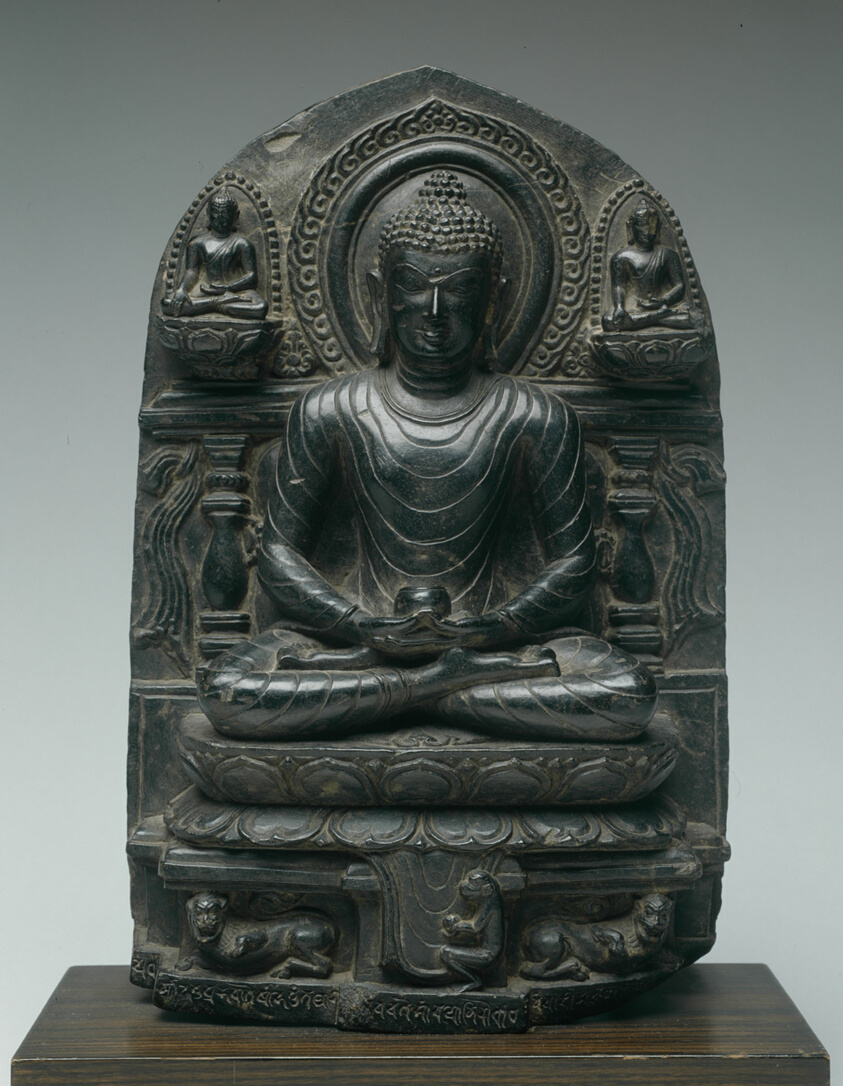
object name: Sculpture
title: Stele with Episode from the Life of the Buddha (Monkey Offers Honey to the Buddha)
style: South Asian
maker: India; Bihar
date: Pala period, 10th century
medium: Black chlorite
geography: Bihar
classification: sculpture; asian art